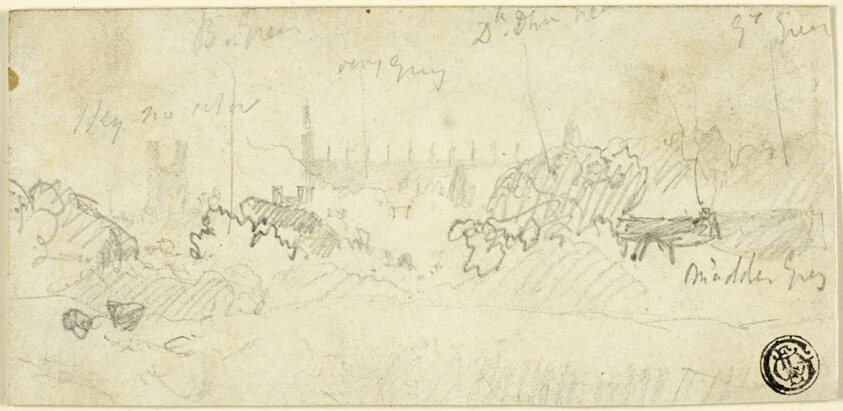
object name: Drawing and Watercolor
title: Sketch of Landscape with Cathedral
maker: John Sell Cotman (English, 1782-1842)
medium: Graphite on ivory wove card, tipped onto ivory wove card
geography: England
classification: graphite; drawings (visual works); prints and drawing